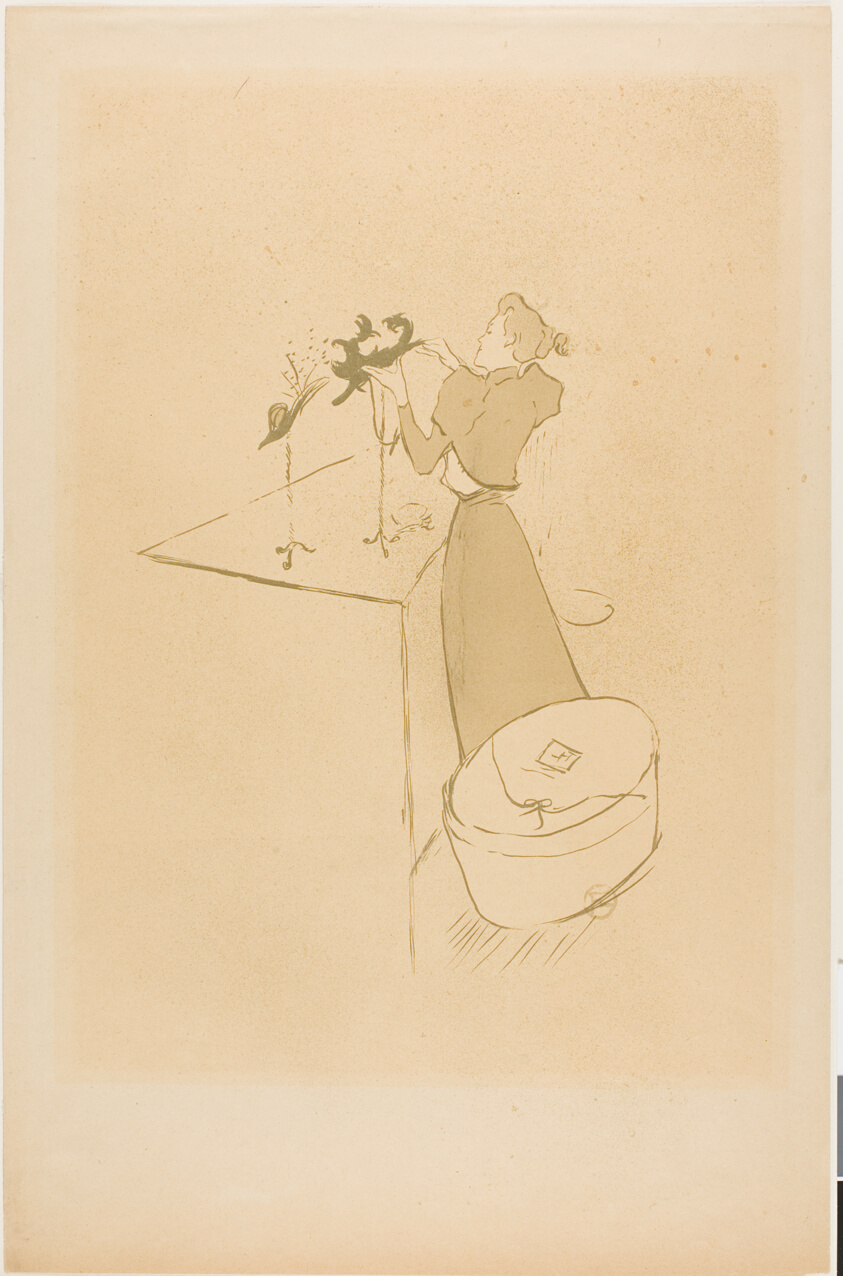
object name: Print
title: The Milliner, Renée Vert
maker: Henri de Toulouse-Lautrec (French, 1864-1901)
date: 1893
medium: Color lithograph on tan wove paper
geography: France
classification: lithograph; print; prints and drawing